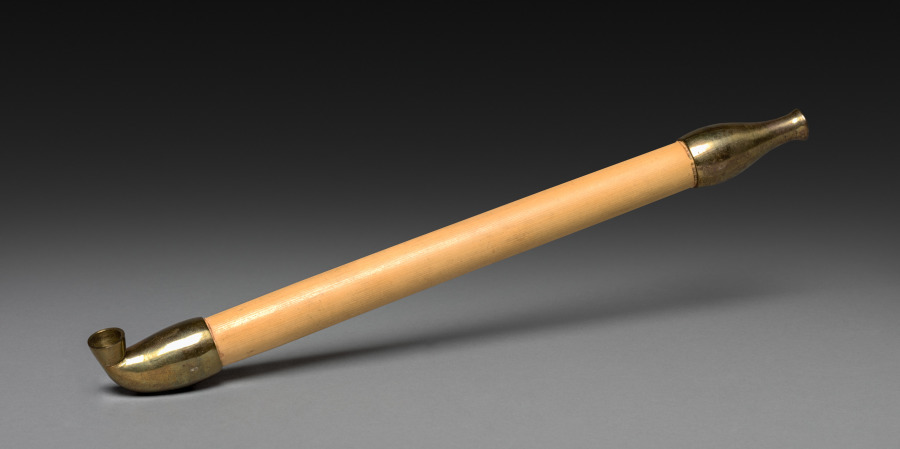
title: Tobacco Pipe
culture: Japan, Edo period (1615–1868) to Meiji period (1868–1912)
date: 1800s–early 1900s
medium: bamboo and brass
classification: Miscellaneous